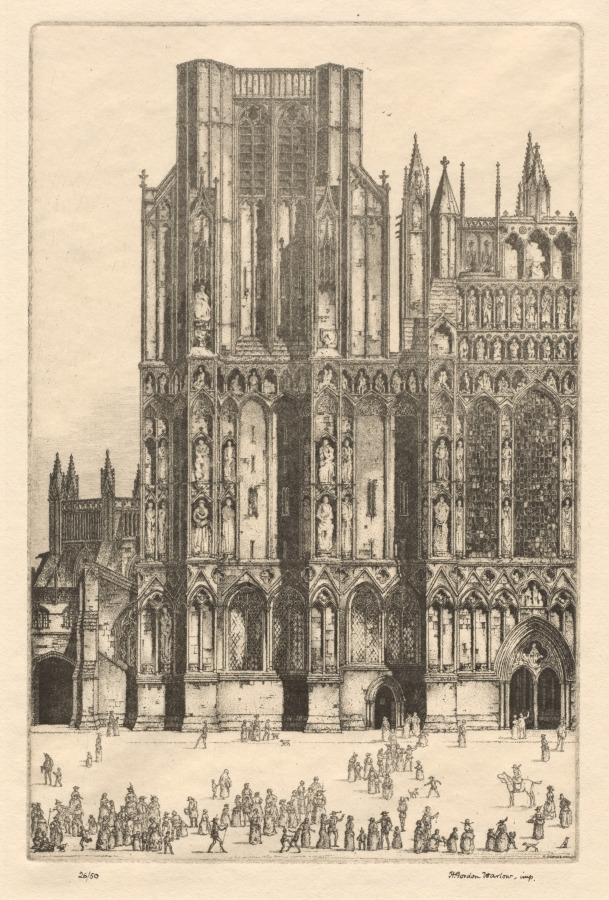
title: Wells Cathedral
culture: England, 20th century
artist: Herbert Gordon Warlow (British, 1885–1942)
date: c. 1930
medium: etching and aquatint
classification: Print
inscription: Lower left: 26/50; lower right, ink: H. Gordon Warlow, imp.